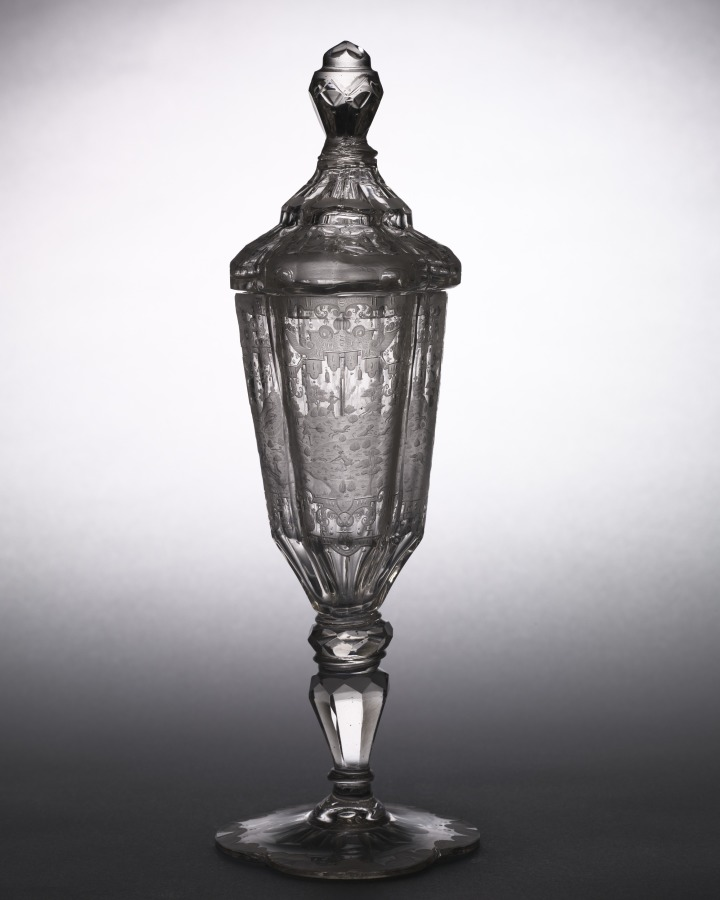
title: Standing Cup with Cover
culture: Germany, Silesia, 18th century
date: c. 1725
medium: glass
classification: Glass